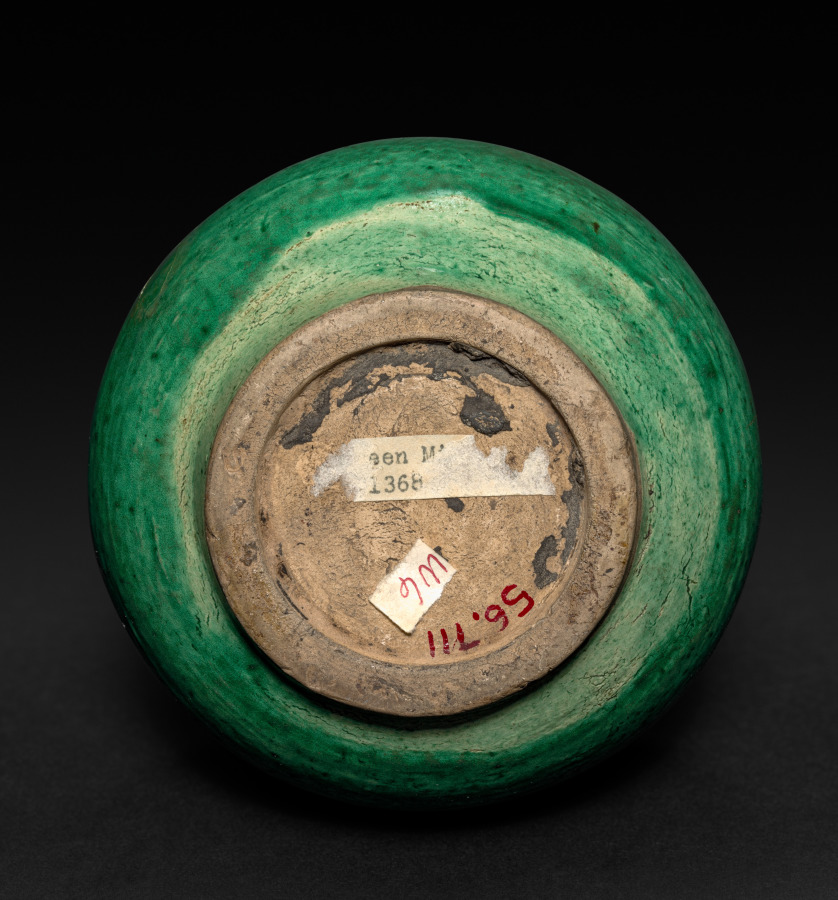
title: Double Gourd-shaped Green Vase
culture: China, Ming dynasty (1368–1644)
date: 1368–1644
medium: stoneware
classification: Ceramic